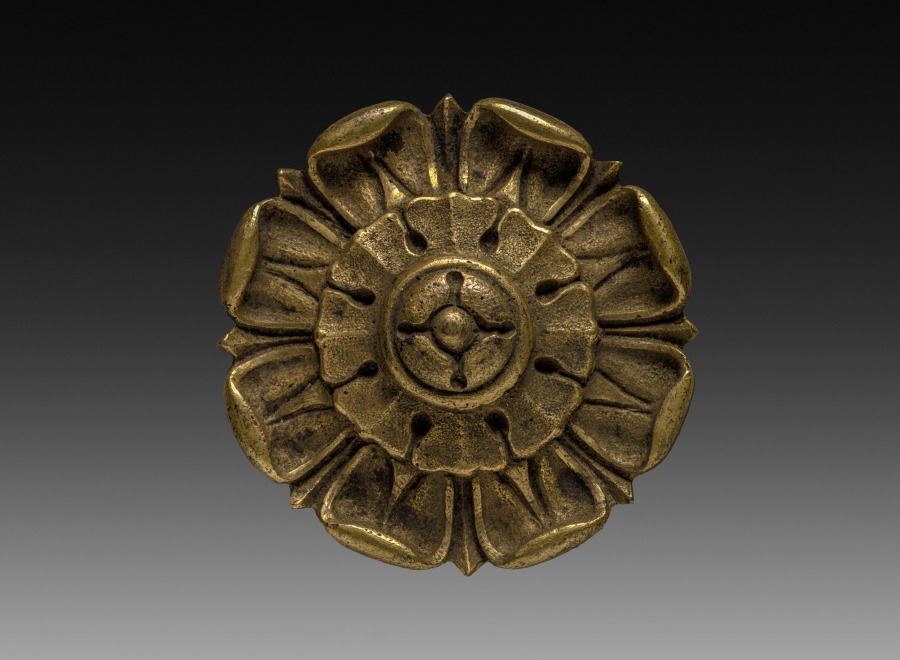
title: Ornamental Rosette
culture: France, late 18th - early 19th centuries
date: c. 1775–1825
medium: gilt bronze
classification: Metalwork